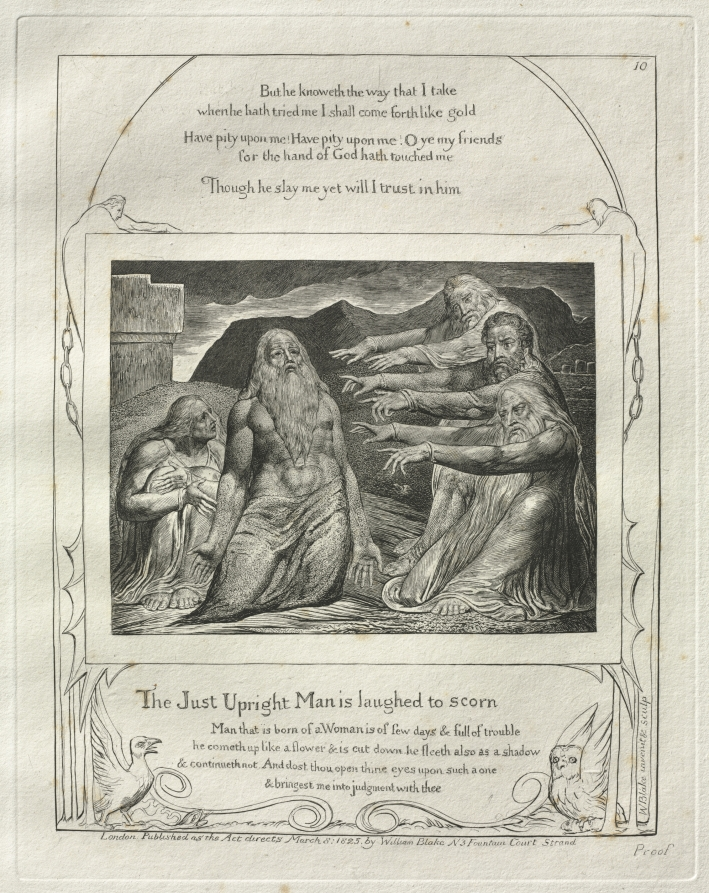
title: The Book of Job: Pl. 10, The Just Upright Man is laughed to scorn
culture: England, 18th century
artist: William Blake (British, 1757–1827)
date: 1825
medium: engraving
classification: Portfolio